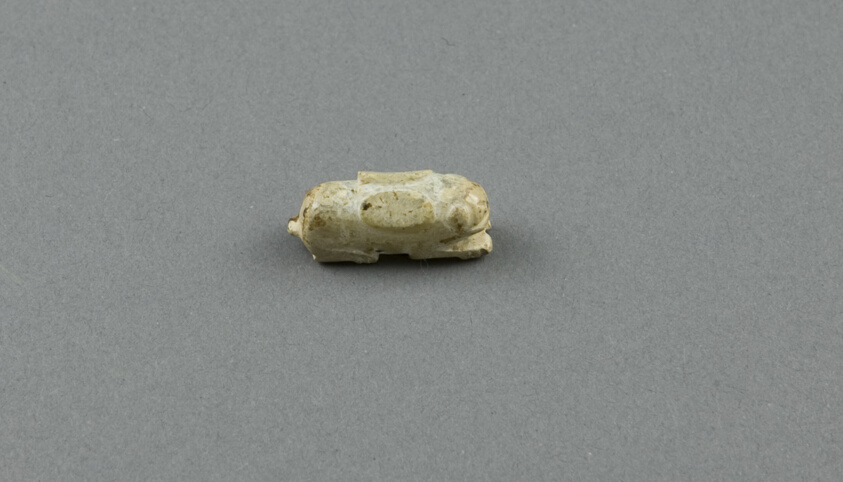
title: Pendant, rabbit.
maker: China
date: Shang dynasty (c.1600–1050 BC)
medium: Jade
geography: China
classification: jade; asian art